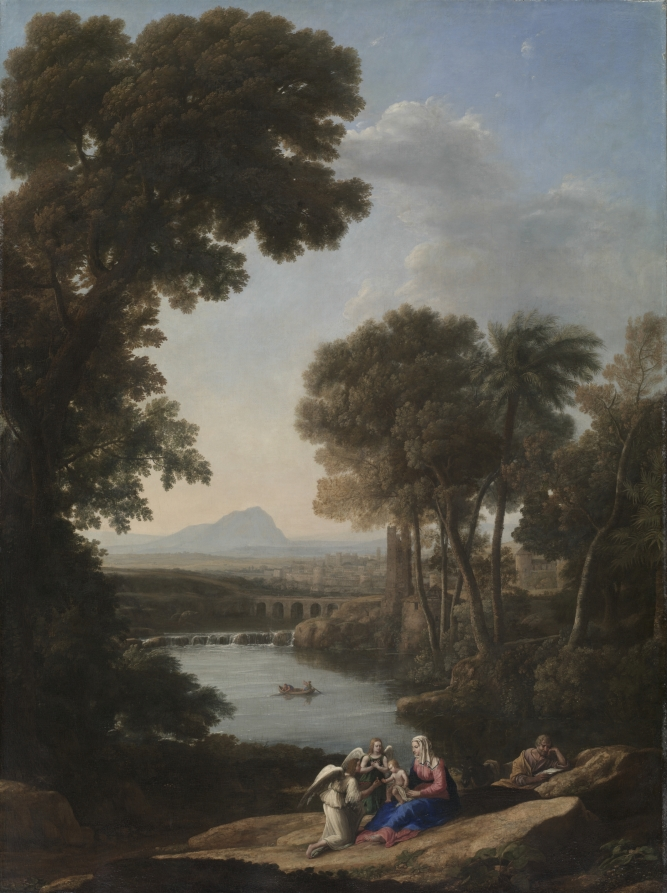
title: Rest on the Flight into Egypt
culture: France, 17th century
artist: Claude Lorrain (French, 1604–1682)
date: early 1640s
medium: oil on canvas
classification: Painting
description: One of the most influential landscape painters of the early modern era, Lorrain was a master of the “ideal landscape,” which combined lush foliage and a tranquil atmosphere with allusions to an idyllic, imaginary past. The intention was to create views more beautiful and harmonious than nature itself. In the foreground of this soaring landscape, the Holy Family rests on a shady bank as kneeling angels offer fruit to the Christ child. Landscape paintings like this were much in demand among wealthy collectors throughout Europe, for whom these expansive idealized scenes represented a calm retreat from their hectic city lives.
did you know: Lorrain placed this Middle Eastern biblical event in the Roman countryside.